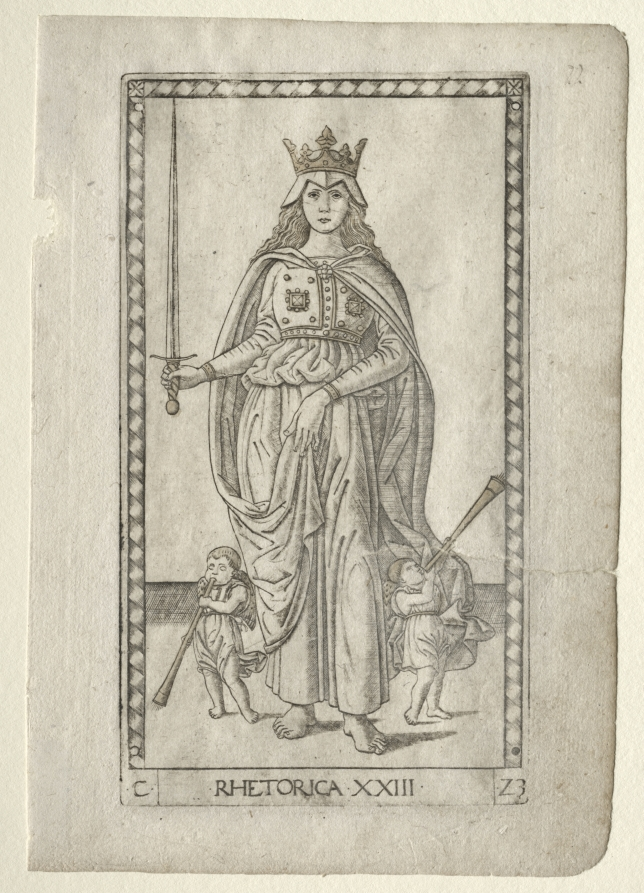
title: Rhetoric (from the Tarocchi, series C: Liberal Arts, #23)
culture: Italy, Ferrara, 15th century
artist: Master of the E-Series Tarocchi (Italian, active 1460s)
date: before 1467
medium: engraving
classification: Print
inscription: Lettered below the image of Rhetorica (Rhetoric): ·C· / ·RHETORICA·XXIII· / ·23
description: This engraving is part of the group “C” named Liberal Arts. Conceptually, the liberal arts descended from classical antiquity, and were divided into the Trivium (Grammar, Rhetoric, and Dialectic or Logic) and the Quadrivium (Music, Geometry, Arithmetic, and Astronomy). In the Tarocchi set the total number was risen to ten, with the addition of the three disciplines (Poetry, Philosophy, and Theology). The liberal arts denoted knowledge or skills considered necessary to participate in a free society. By the late Middle Ages, they began to be represented in the visual arts as womanlike allegories. Here, Rhetorica (Rhetoric) is personified as a full-length female figure, in frontal view. She wears a crown and holds a sword in her right hand. On both her sides, two small genii blow a trumpet. Rhetoric teaches how to speak in a flowery and elegant way.